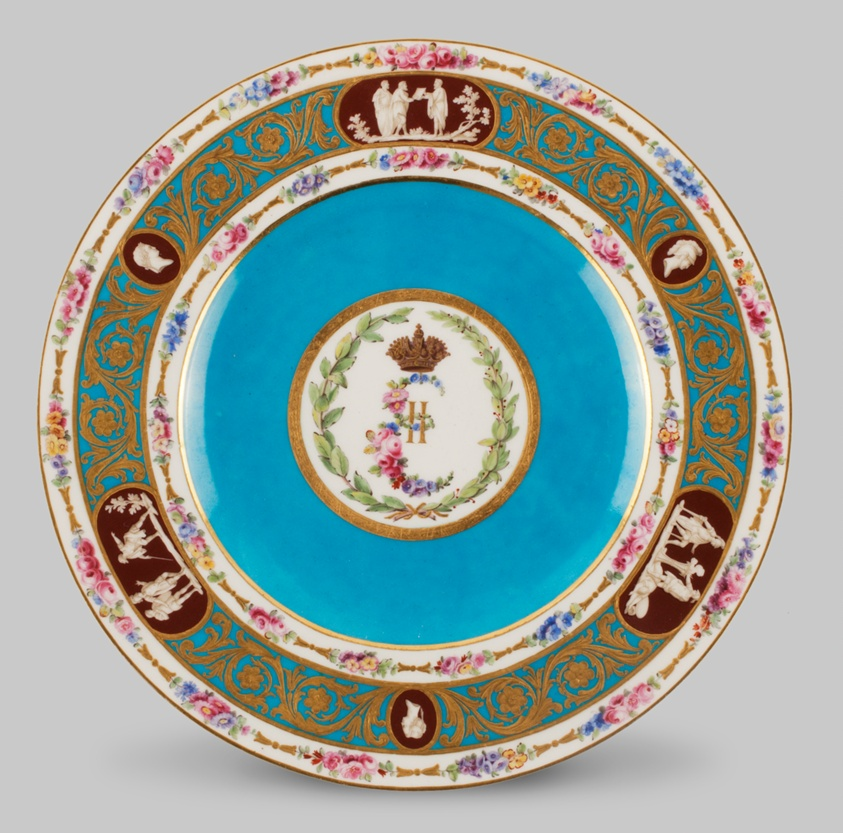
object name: Ceramics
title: Plate from the Catherine the Great Service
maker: Sèvres Porcelain Manufactory; French, founded 1740; Painted by Edmé-François Bouillat (French, 1758–1810), Pierre-Antoine Méreaud (French, active 1754–91), and Philippe Castel (French, active 1771–97); Gilded by Etienne-Henry Le Guay (French, active 1748–49, 1751–96)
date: 1778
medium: Soft-paste porcelain, turquoise-blue ground, polychrome enamels, and gilding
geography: Sèvres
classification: plate (general, dish); tableware; dish (vessel); ceramics; porcelain; european decorative arts